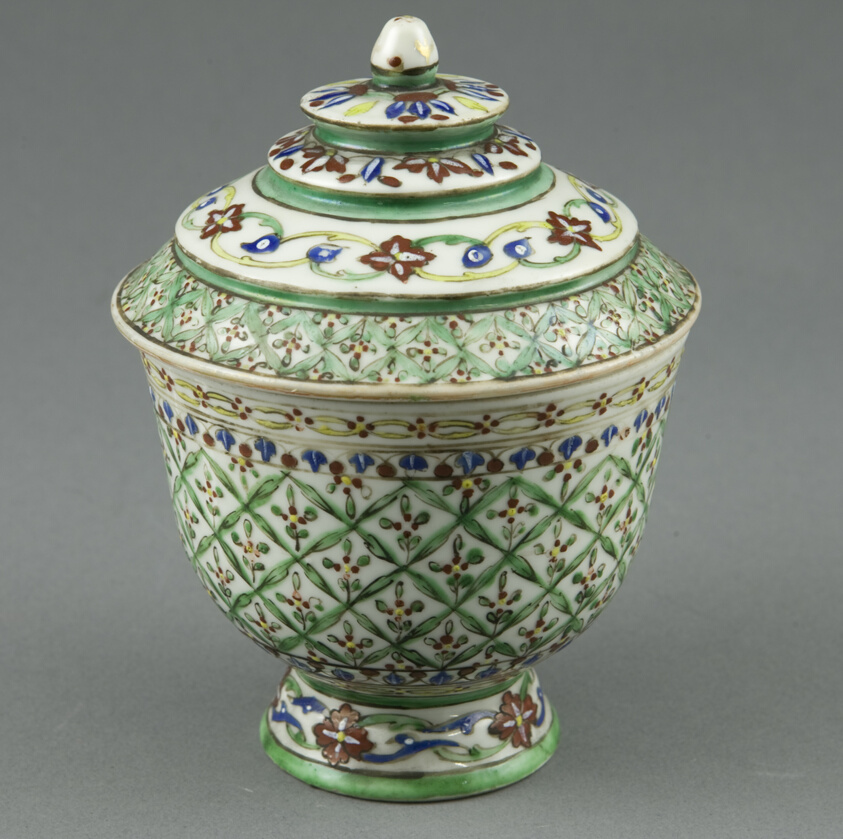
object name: Decorative Arts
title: Bencharong (Five-Colored) Ware, Jar with Tiered Cover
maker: China, for the Thai Market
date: 19th century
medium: Porcelain painted in overglaze polychrome enamels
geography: China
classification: porcelain; asian art; ceramics; decorative arts